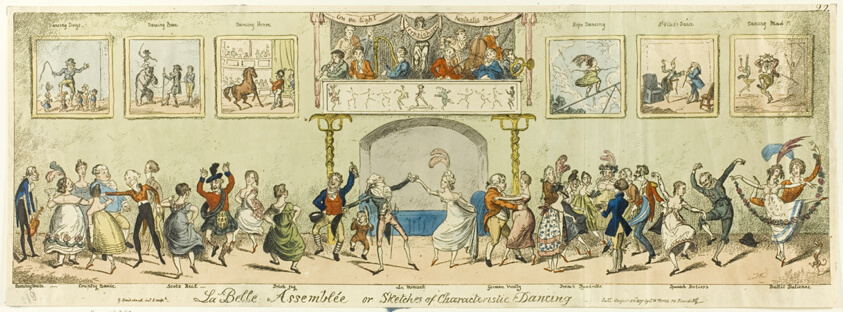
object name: Print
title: La Belle Assemblée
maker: George Cruikshank (English, 1792-1878); published by S.W. Fores (English, 1761-1838)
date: published August 31, 1817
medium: Handcolored etching on wove paper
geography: England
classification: etching; print; prints and drawing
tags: dogs, animals